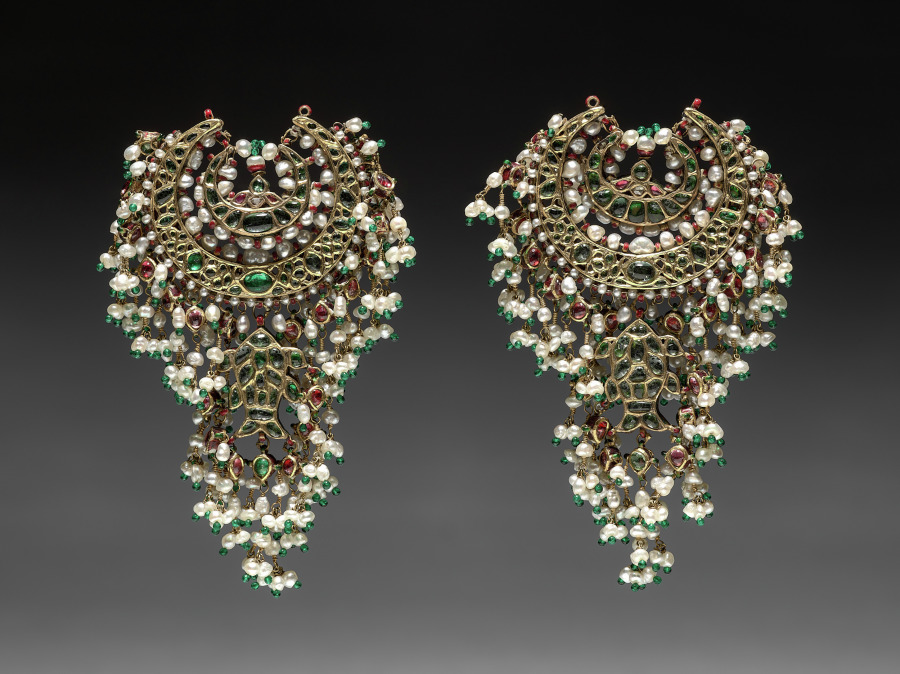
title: Pendants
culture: India, Delhi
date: 1800s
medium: Gilt silver with diamonds, emeralds, rubies, pearls, and enamel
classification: Jewelry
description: Worn either as earrings or pendants from a crown, these double-sided, symmetrical jeweled assemblages each feature a fish as the central ornament. The pair of fish is one of a set of eight auspicious symbols known in Indian art for more than two millennia. As creatures of the waters that are essential for life, they betoken fertility and abundance—attributes of an ideal ruler.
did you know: The fish are crystal on one side and emerald on the other.